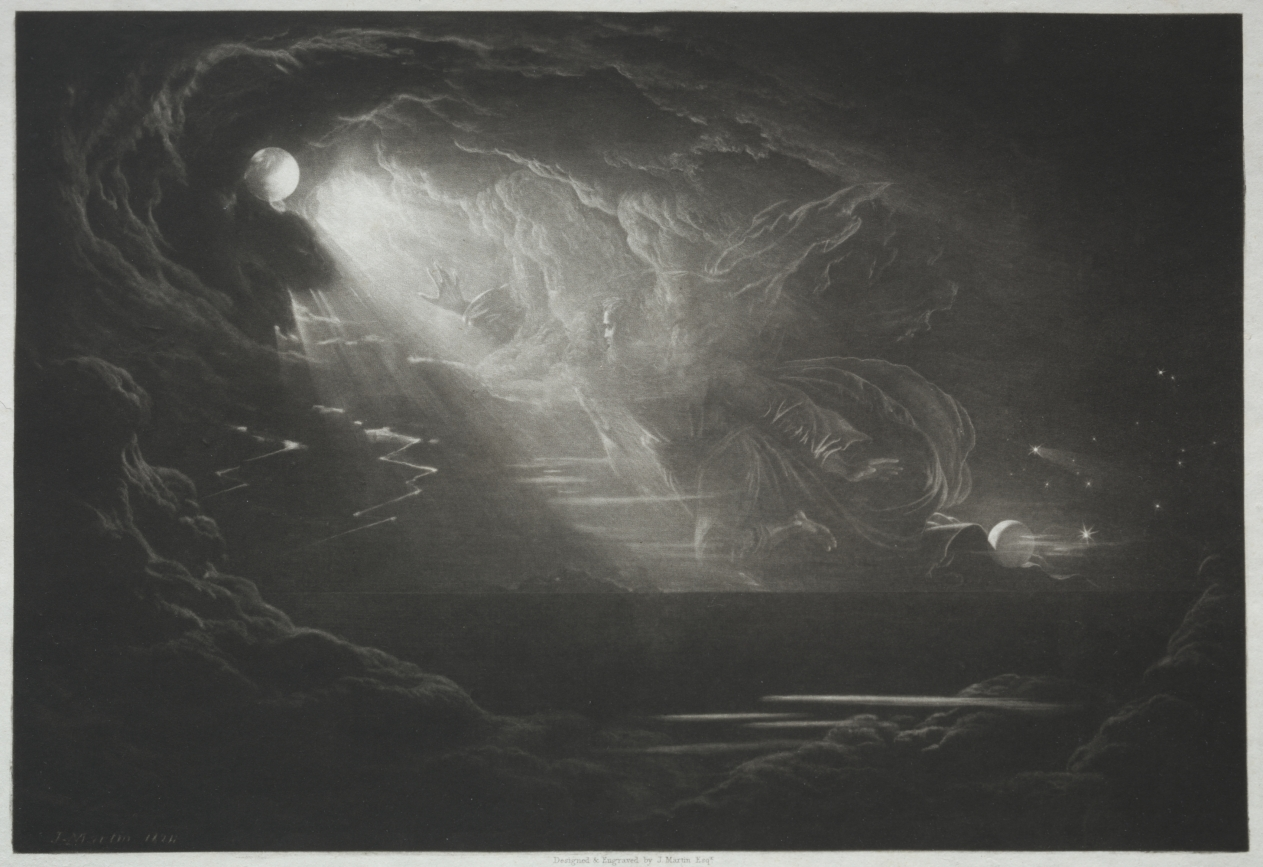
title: Paradise Lost: The Creation of Light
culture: England, 19th century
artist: John Martin (British, 1789–1854)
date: 1824, published 1825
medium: mezzotint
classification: Print